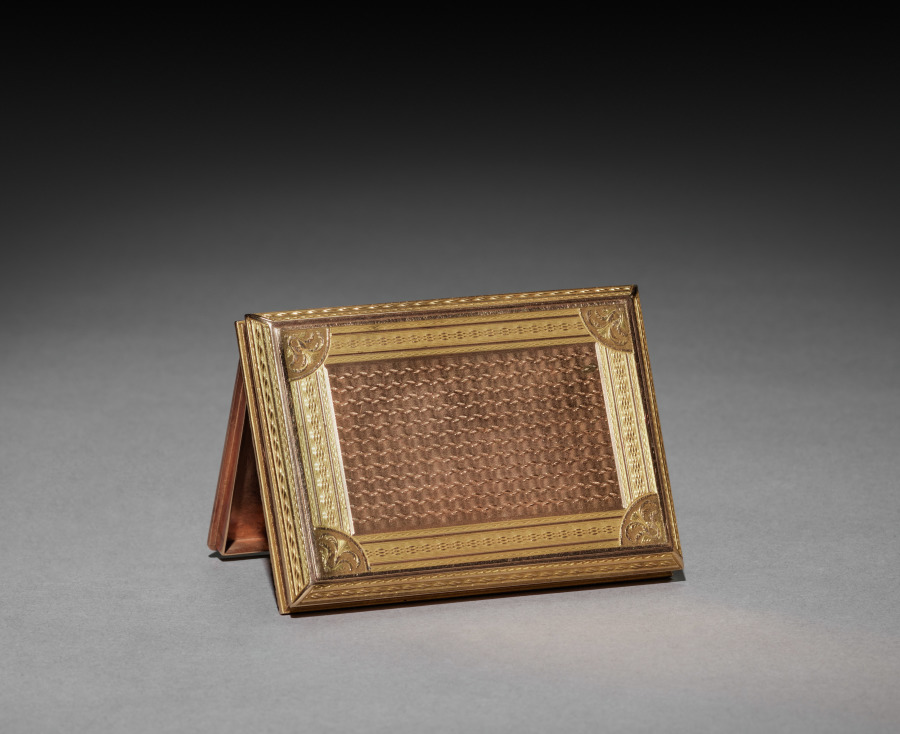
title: Snuff Box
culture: Switzerland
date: c. 1825–1850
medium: gold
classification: Miscellaneous